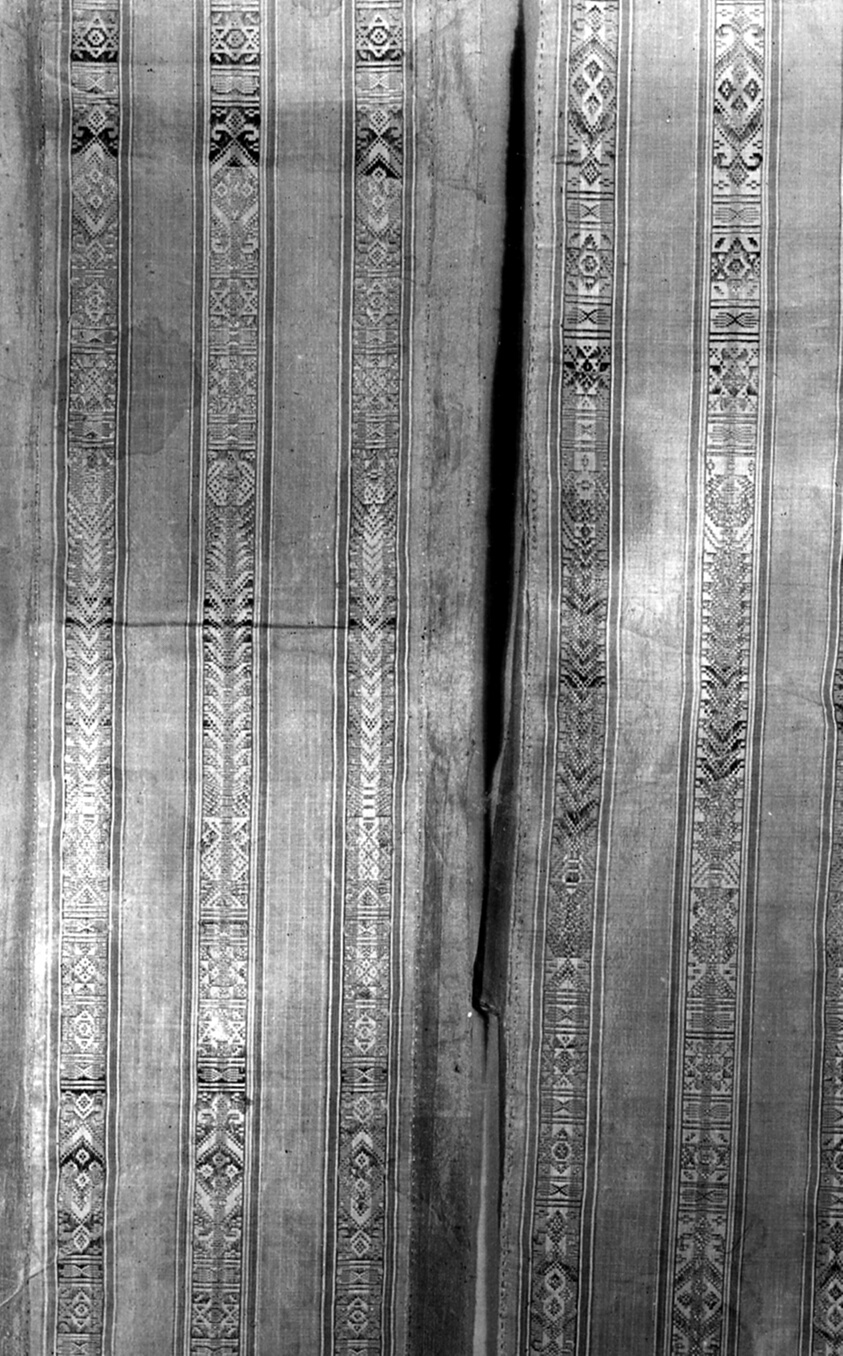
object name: Textile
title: Two Panels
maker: Europe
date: 19th century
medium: Silk, plain weave with supplementary patterning warps; edged with silk, plain weave ribbons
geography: Europe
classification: textile; weaving